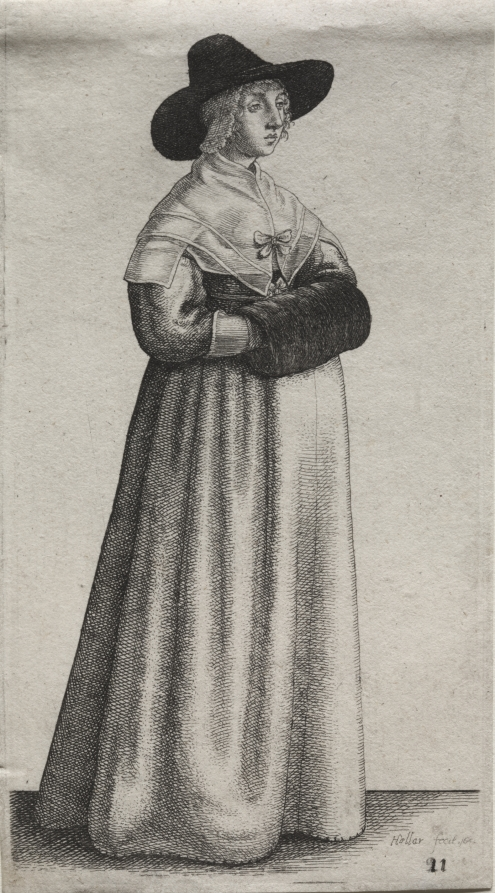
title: The Several Habits of English Women, from the Nobility to the Country Women as they are in these times: The Woman with a Mannish Hat and Dark Muff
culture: Bohemia, 17th century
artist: Wenceslaus Hollar (Bohemian, 1607–1677)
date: 1640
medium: etching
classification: Print